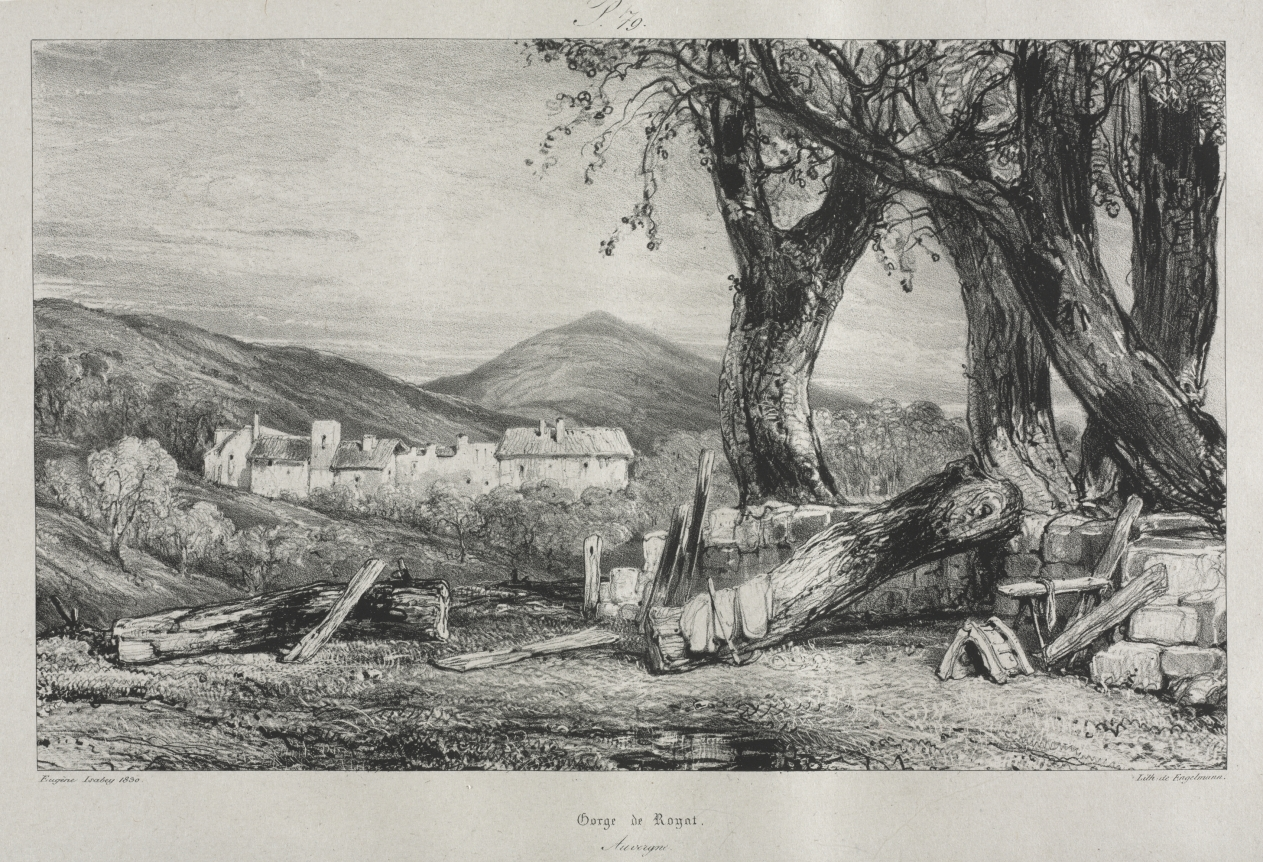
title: Picturesque and Romantic Journeys in Old France: Auvergne (vol. II), Gorge of Royat, Plate 79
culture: France, 19th century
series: Plate 79 from Voyages Pittoresques...Auvergne vol. 1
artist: Eugène Isabey (French, 1803–1886)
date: 1830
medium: lithograph on chine collé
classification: Print